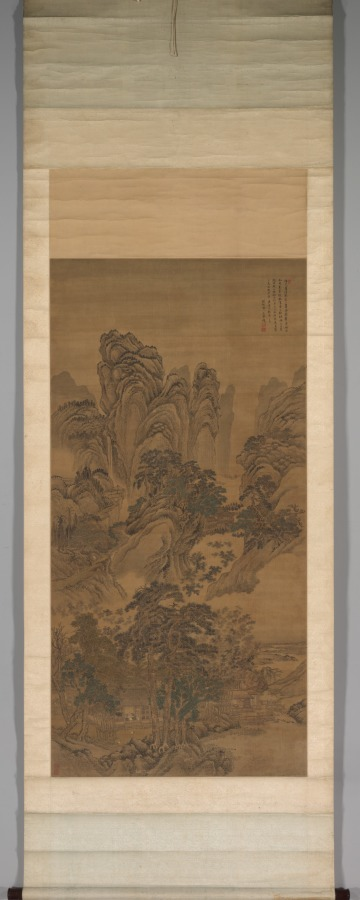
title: Landscape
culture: China, Qing dynasty (1644-1911)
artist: Wang Hui (Chinese, 1632–1717)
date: 1632–1717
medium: hanging scroll, color on silk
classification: Painting